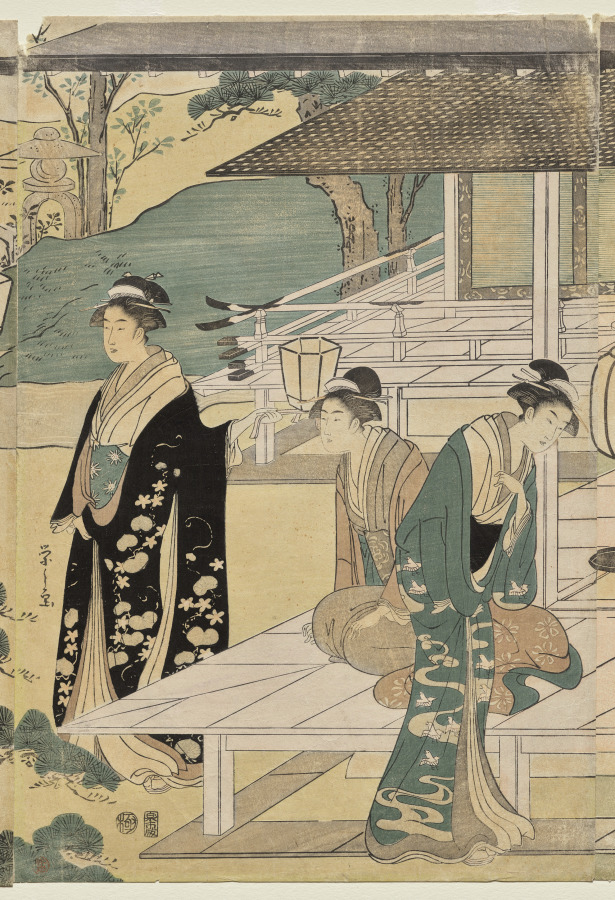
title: The Matsukaze Chapter of the Tale of Genji (from the series The Tale of Genji in Elegant Modern Dress)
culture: Japan, Edo period (1615–1868)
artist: Chōbunsai Eishi (Japanese, 1756–1829)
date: c. 1791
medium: color woodblock print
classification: Print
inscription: Signature: Eishi ga Publisher: Izumiya Ichibei (Senichi han) Seal: kiwame